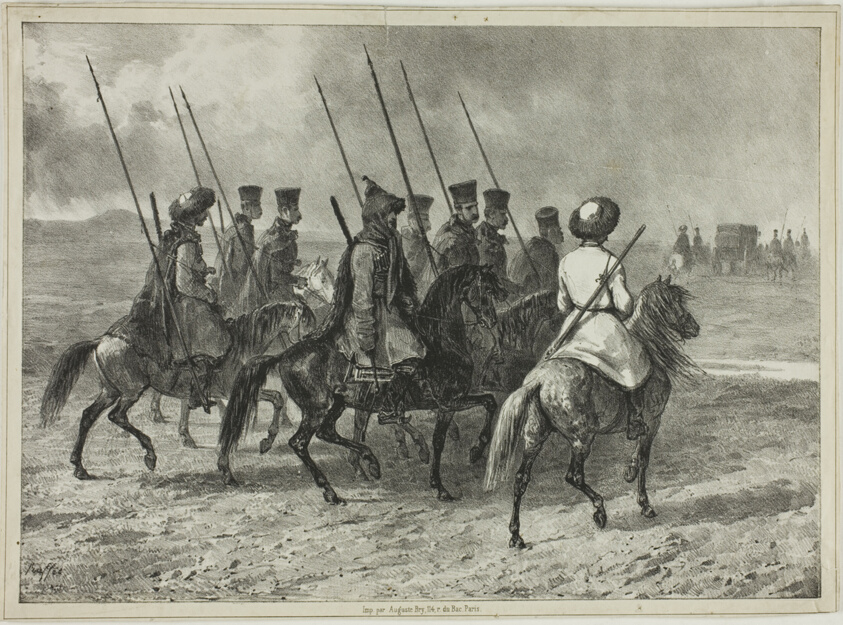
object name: Print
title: Cossack Escort to the Border of Kuban, Taman (Central Russia), October 11, 1837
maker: Denis Auguste Marie Raffet (French, 1804-1860); printed by Auguste Bry (French, 19th century)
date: 1838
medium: Lithograph in black on ivory chine laid down on cream wove paper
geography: France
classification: lithograph; print; prints and drawing